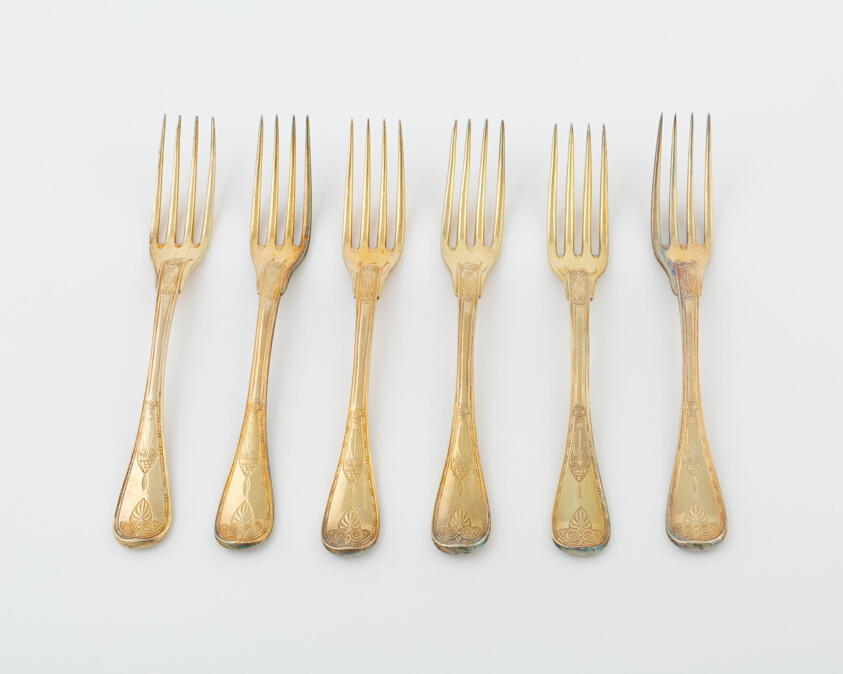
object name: Metalwork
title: Set of Dinner Forks (10)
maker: Martin-Guillaume Biennais; French, 1764–1843; Pierre-Benoît Lorillon; French, 1757–1816; Paris, France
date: 1789–1820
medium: Silver gilt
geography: Paris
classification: silver; metalwork; european decorative arts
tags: Borghese Service